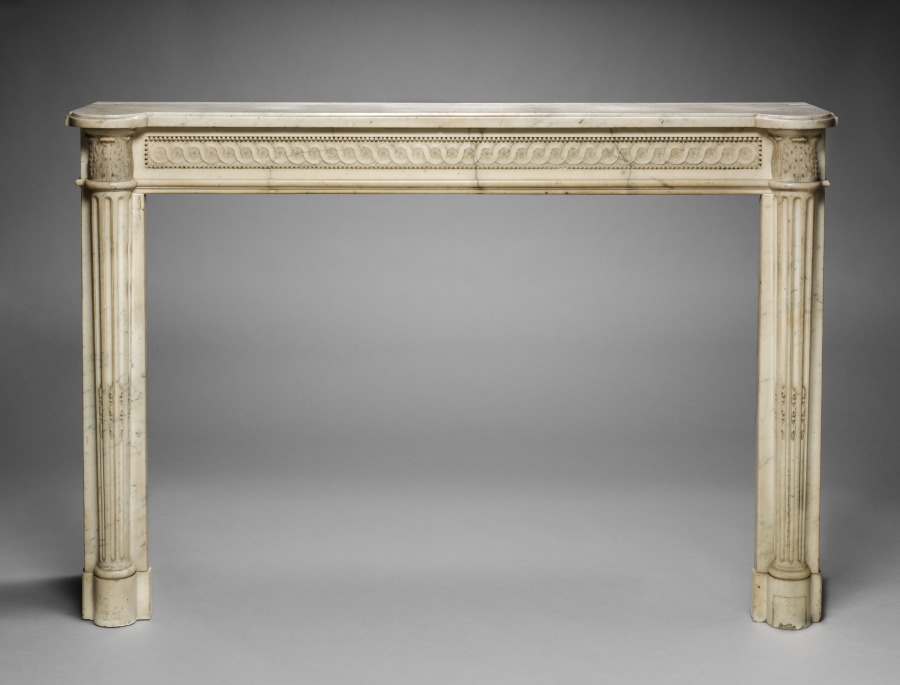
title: Andiron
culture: France, style of Louis XVI, 18th Century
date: c. 1770–1790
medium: marble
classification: Furniture and woodwork